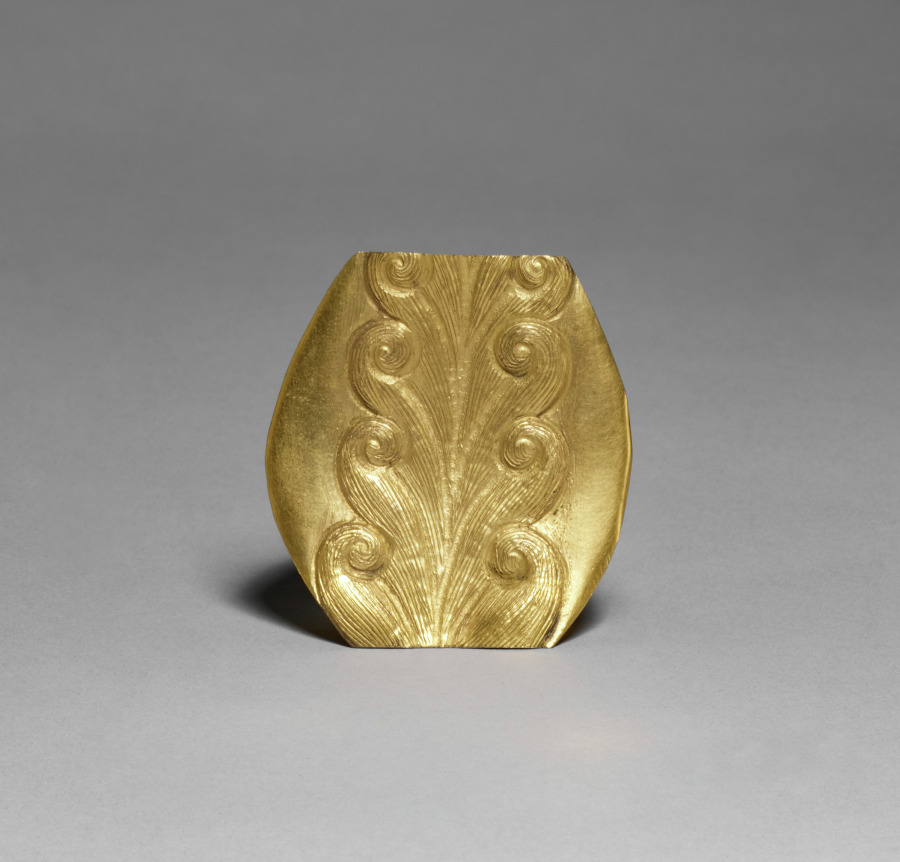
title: Container in the Form of a Unicorn (lid)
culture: China, Qing dynasty (1644-1911), Qianlong mark and reign (1736-95)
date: 1736–95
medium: gilt copper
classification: Enamel